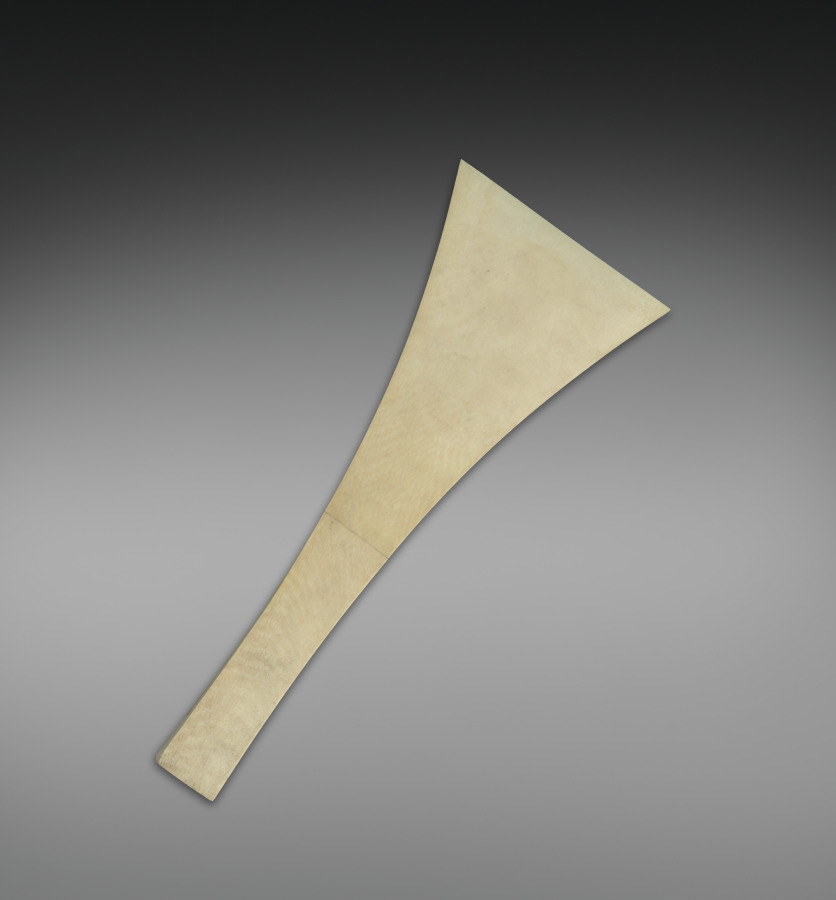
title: Guitar (plectrum)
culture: Japan, Edo period (1615–1868)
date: early to mid-1800s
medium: mixed media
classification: Musical Instrument